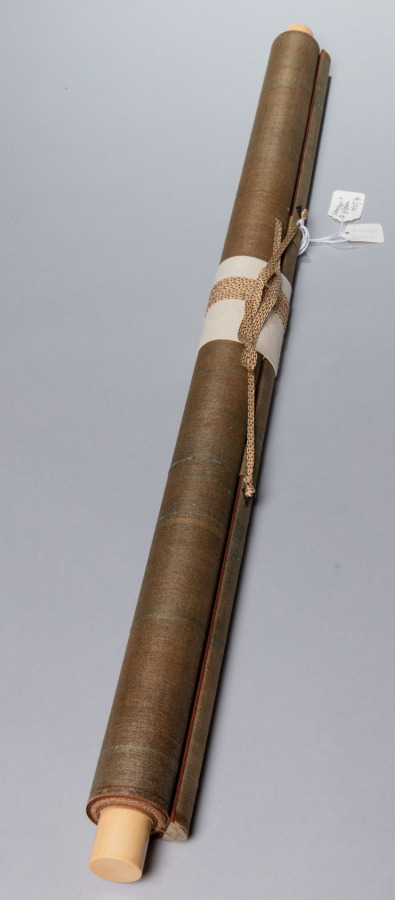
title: Hanshan and Shide (Kanzan and Jittoku)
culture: Japan, Muromachi period (1392–1573)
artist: Shikibu Terutada (Japanese, active mid-1500s)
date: mid-1500s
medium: Fan-shaped painting mounted as hanging scroll; ink and gold on paper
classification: Painting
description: These three fan-shaped paintings, now mounted as individual hanging scrolls, were once part of a set of 20 mounted on a folding screen. They portray the Chinese subjects, from left to right, of the scholar-official Pan Lang, Hanshan reciting his poetry to Shide, and a duck in flight above reeds. Pan Lang grew so fond of the mountain in his place of exile that when he was ordered back to the capital, he rode backward on his donkey so he could see it until it receded into the distance. Hanshan and Shide worked in the kitchen of a Zen monastery, but were actually reincarnations of the bodhisattvas Manjushri and Samantabhadra. The combination of a mandarin duck and reeds may have signified a level of attainment in Chinese civil service exams. All three paintings bear the seal of the Kantobased artist Shikibu Terutada. Shikibu was familiar with Kano school painting, but he also modeled his early style after that of the prominent Kanto-based Kenkō Shōkei (active about 1470–after 1523).